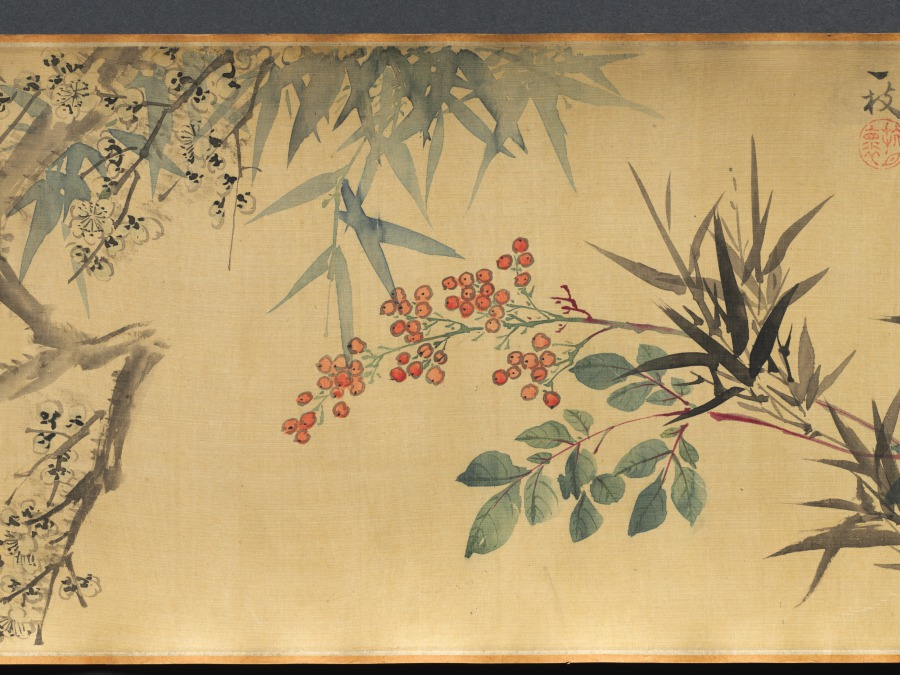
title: Flowers of Four Seasons, with Poems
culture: China, Ming dynasty (1368–1644)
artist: Wang Guxiang (Chinese, 1501–1568)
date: 1531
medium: handscroll; ink and light color on silk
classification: Painting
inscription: Artist's inscription, signature, and 15 seals. Ink Orchids. Sewn as pendants for the man of worth, swaying quiety, fragrance in the valley. [seal] Hsiao-chu ts'un Peony. Wiping his face, the young gentleman Ho [Ho Yen of Wei, Three Kingdoms] appears to have been powdered. His previous life was the perfume-stealing Han Shou [of Chin, 265–419 CE], the fragrance still lingers. [seal] Ts'un-wu chai. Flowering Crab Apple, New Bamboo. Shao-lin [Du Fu, 712–770] had to put down his brush. [Flowering Crab Apple]. Yü-k'o [Wen T'ung, d. 1079) in vain wrote poems about [Bamboo]. [seal] Yu-shih. Lotus Flowers. When she turns her head, half-hidden by a fan, and casts a glance, all the beautiful women become colorless. [seal] K'ang yüeh huai. Loquat. Ripeness in summer. [seal] Lu-chih. Pomegranate Flower. Whenever I remember you I will send my thoughts, but where have you gone--the [skirt] of pomegranate red? [seal] Wu-ho Sheng. Day Lily. Plant the day lily to forget sorrow. [seal] Yu-shih. Chrysanthemum. The untrammelled joy at the eastern fence. [seal] Lu-chih. Begonia. Comparing it to the beauties of Spring, and spreading them out as trimming for the stone steps. [seal] Yu-shih. Hibiscus. In recent years I have always enjoyed looking at flowers; instead of dark red I preferred pink ones. [seal] Jen-sheng i-lou. Narcissus, Camellia. The jade girdle left behind at Lo River. [Narcissus]. The precious pearls glitter before Spring. [Camellia]. [seal] Lu-chih. Heavenly Bamboo (Nandina domestica). A single branch in the wintry season. [seal] K'ang yüeh huai. Plum. Fragrant snow in the Lo-fou Mountains. [seal] Ts'un-wu chai. In the eleventh lunar month of the hsin-mao year of the Jiaqing era [1531], [I] imitated the boneless style of Yüan masters in sketching from life. Guxiang [seals] Yu-shih; Lu-chih. Translated by Wai-kam Ho/Lingyun Shih Liu (1980)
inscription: 2 colophons and 23 additional seals: 1 colophon dated 1632, and 2 seals of Li Jih-hua [Li Rihua] 李日華 (1565–1635); 1 colophon and 2 seals of Xiang Shengmo 項聖謨 (1597–1658); 3 seals of Liang Qingbiao 梁清標 (1620–1691); 6 seals of the Jiaqing 嘉慶 emperor (r. 1796–1820); 9 seals of Ch'eng Ch'i [Cheng Qi] 程琦 (1911–1988)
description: In this painting, flowers are loosely arranged by the seasons: narcissus and peony represent early spring; yellow loquat and lotus, summer; chrysanthemum, autumn; and the plum and evergreen bamboo, winter. The artist added to each flower a poetic line of calligraphy associating each plant with a historic or legendary figure. For example, the chrysanthemum, along with the line “The untrammeled joy at the eastern fence,” refers to the poet Tao Yuanming (died AD 427) who enjoyed chrysanthemums at the eastern fence in his garden. The scroll illustrates Wang Guxiang’s mastery of free brushwork, combining light monochrome ink with transparent colors. In his inscription, Wang says he used the “boneless” style without outlines as developed during the Yuan dynasty (1279–1368). Wang was a native of Changzhou, a city in southeast China known for its rich flora and fauna, and flower-and-bird painting tradition.